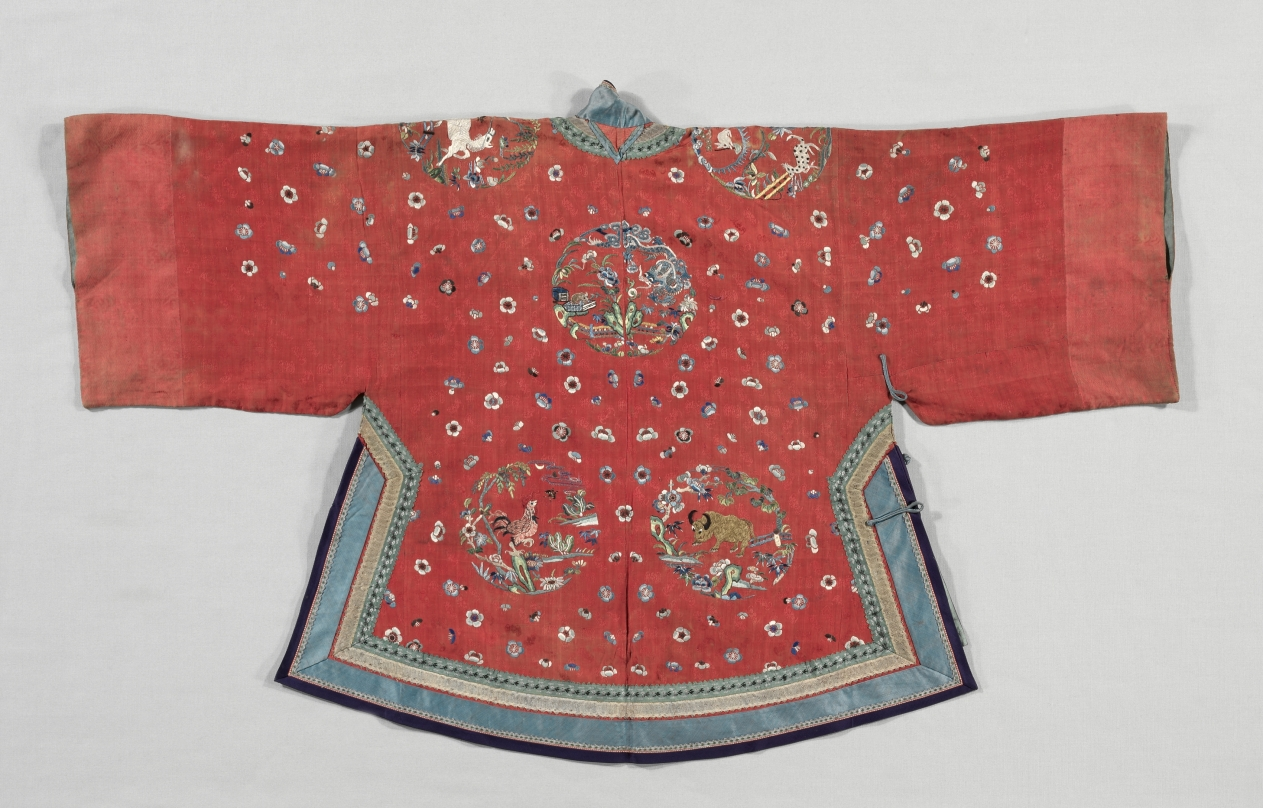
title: Embroidered Coat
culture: China, Qing dynasty (1644–1911)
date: 1800s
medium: embroidered silk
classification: Garment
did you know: This coat contains signs of the zodiac.